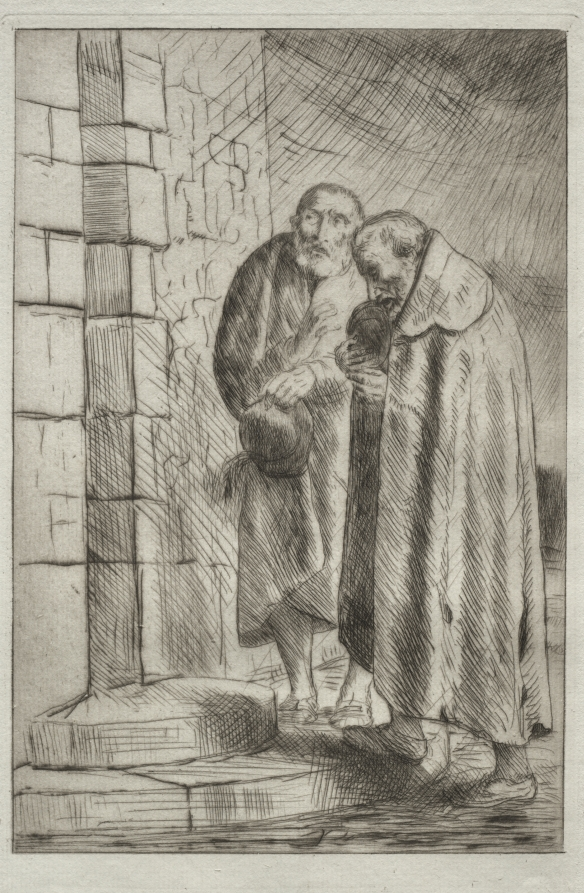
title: St. Pierre et St. Paul à la porte de M. Richard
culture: France, 19th-20th century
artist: Alphonse Legros (French, 1837–1911)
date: c. 1857–1911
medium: etching and drypoint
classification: Print